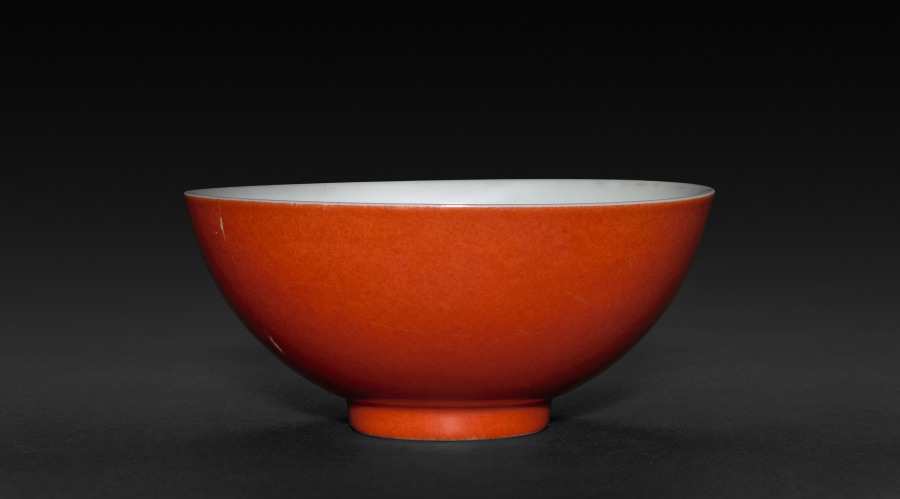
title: Wine Cup with Monochrome Red Glaze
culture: China, Jiangxi province, Jingdezhen kilns, Qing dynasty (1644-1911), Yongzheng mark and reign (1723-35)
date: 1723–35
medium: porcelain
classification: Ceramic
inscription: 大清雍正年制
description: In the Qing dynasty (1644–1911), luxury items became more affordable to larger parts of the society, including women, merchants, and literati in non-official positions. Imperial patronage and a growing urban population encouraged consumption of luxury goods and local craftmanship. This wine cup has a coral glaze on outside and a transparent glaze of white eggshell porcelain on the inside. It exemplifies Qing dynasty accomplishments in porcelain techniques and the creative mind of talented artisans who sought clients on a competitive market.